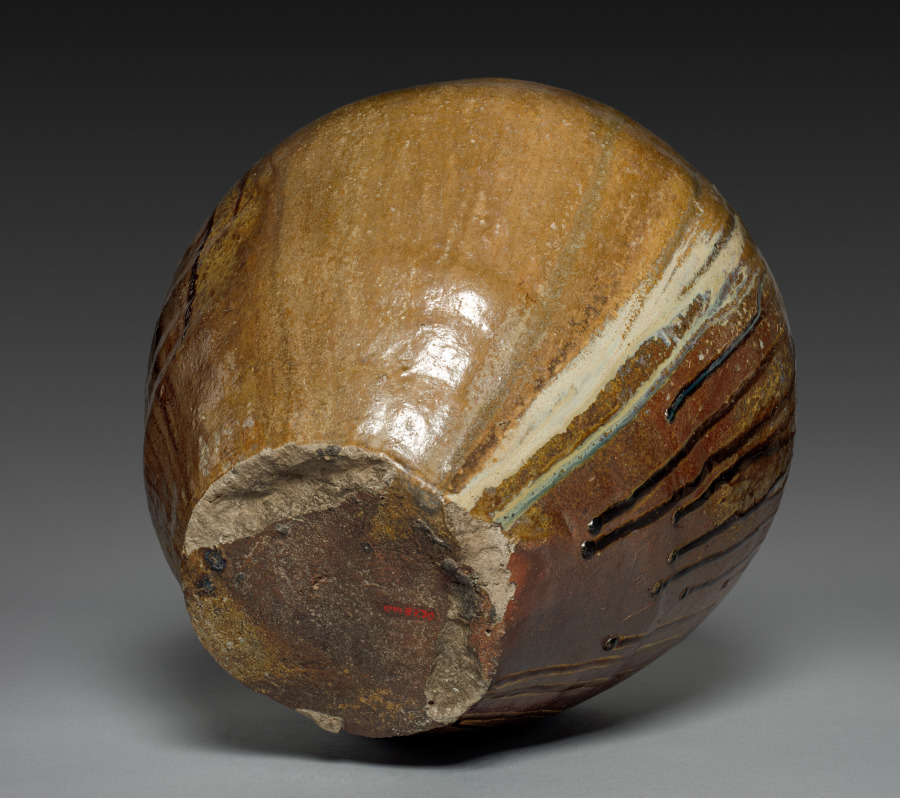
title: Storage Jar, Echizen Ware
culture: Japan, Muromachi period (1392–1573)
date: 1400s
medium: stoneware with natural ash glaze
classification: Ceramic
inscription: Incised artisan's mark